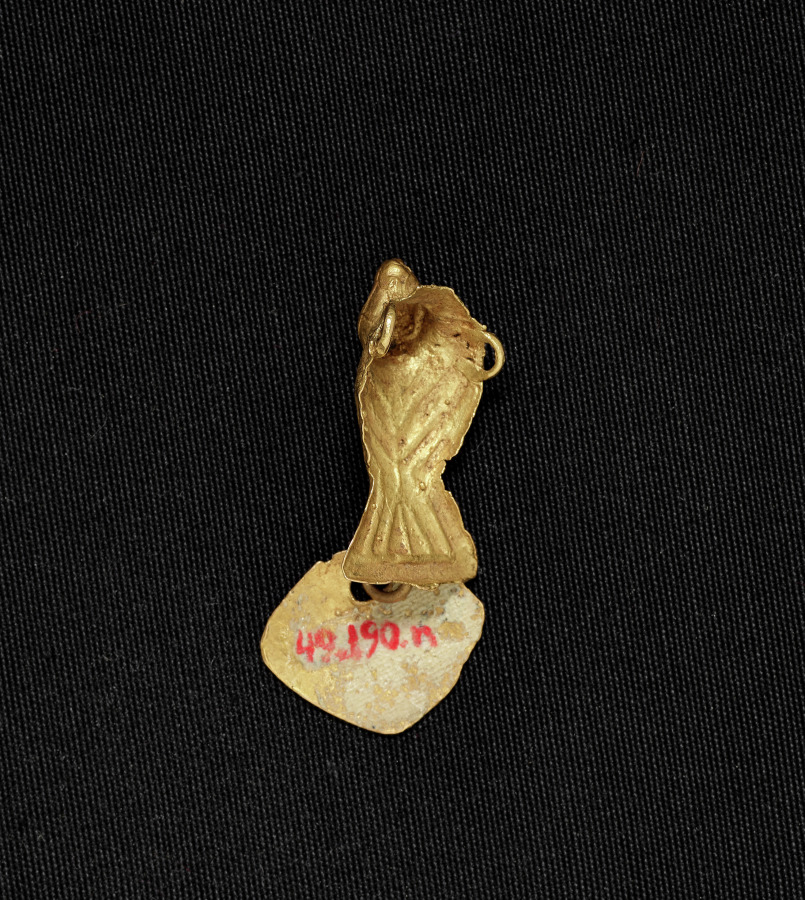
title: Bird Bead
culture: Colombia, Muisca style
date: c. 900–1550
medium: cast gold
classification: Jewelry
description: Muisca metalwork divides into two categories: ornaments to be worn, such as these, and offering figurines, in the case to the right. The elaborate bird pendant features delicate herringbone moldings, openwork patterns, and wing details-all part of the wax model from which the pendant was cast (see nearby computer animation). The dangles were attached after casting.